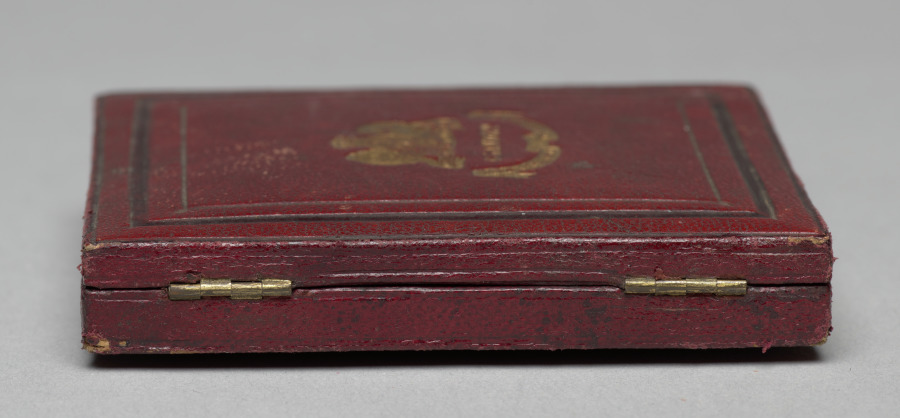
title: High-born lady in white bonnet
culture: France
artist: Antoine Claudet (French, 1797–1867)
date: c. 1855–58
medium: daguerreotype, tinted, sixth plate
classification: Photograph